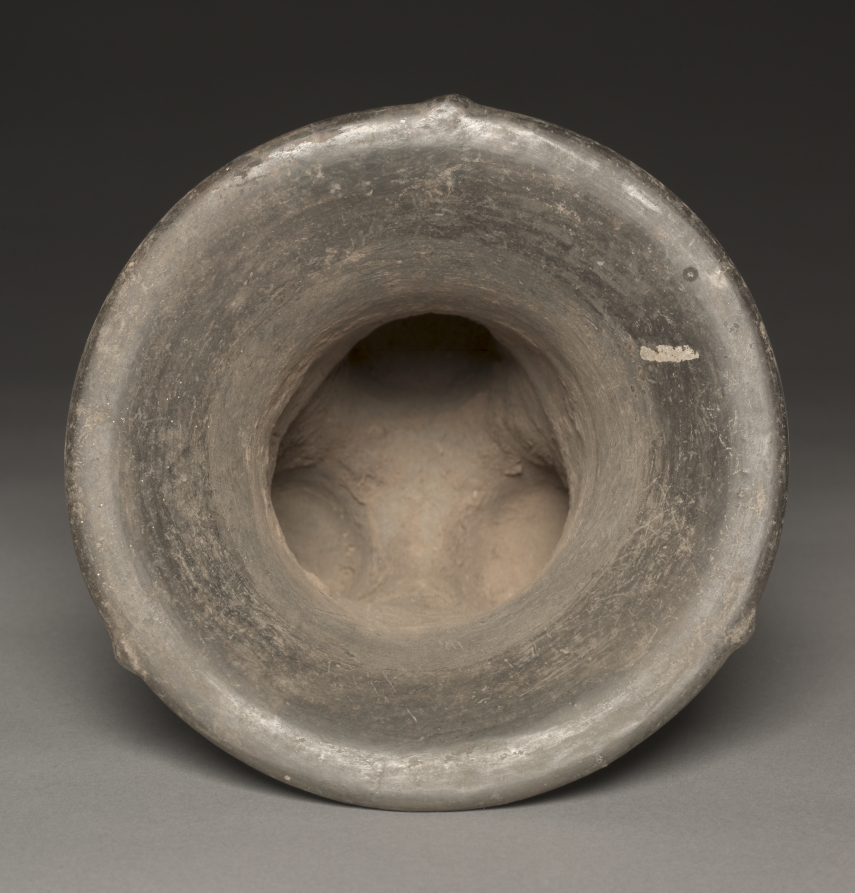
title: Li, Hollow-Legged Tripod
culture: China, Inner Mongolia, lower stratum of the Xiajiadian culture (2200–1600 BCE)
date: 1200–800 BCE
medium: dark gray earthenware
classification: Ceramic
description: This pottery li tripod—which was originally used as a cooking vessel—belongs to the lower stratum of the Xiajiadian culture that flourished in northeast China. Comparable examples with similar shape and proportion have been excavated in Inner Mongolia. A ceramic shape invented and borrowed from central China, li tripod appeared at a later date in the northeast, with limited examples from the late Neolithic period. As an artifact representative of the lower Xiajiadian culture—which was contemporary with the Shang dynasty in central China where bronze production had already been highly developed—pottery li tripod was popular in the northeast during the Bronze Age and was widely spread from the Liaodong to the Liaoxi regions, including Inner Mongolia.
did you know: This vessel not only reveals an interesting relationship between ceramic and bronze shapes but also the cultural impact of central China on the border regions.